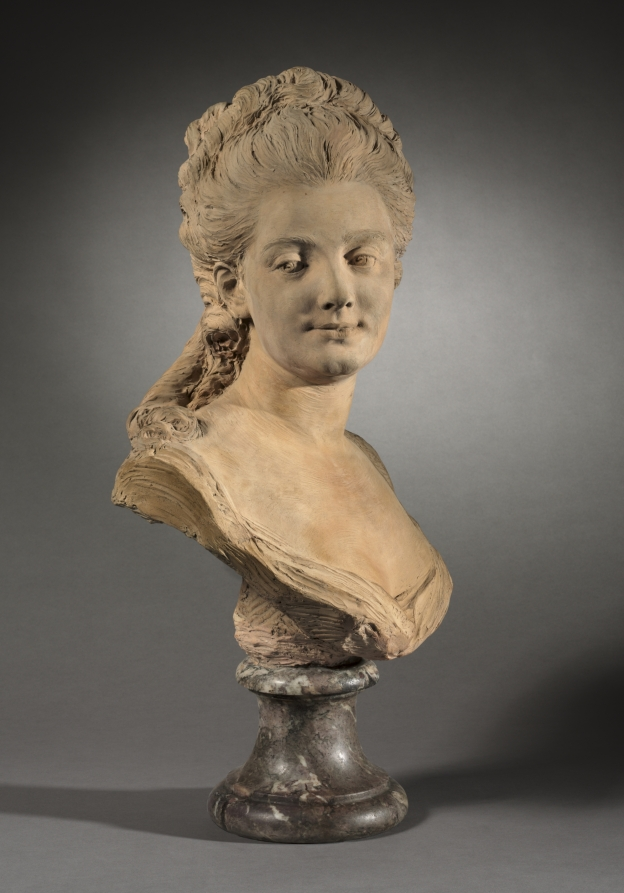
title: Portrait of Melle de Vandeul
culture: France, 18th century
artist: Jean-Baptiste Lemoyne (French, 1704–1778)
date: possibly 1760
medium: terracotta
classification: Sculpture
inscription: Signed underneath shoulder: J. B. Lemoyne (incised).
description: Lemoyne specialized in portrait busts of wealthy Parisians. In this case, the sitter is a close relative of important French critic and writer Denis Diderot.